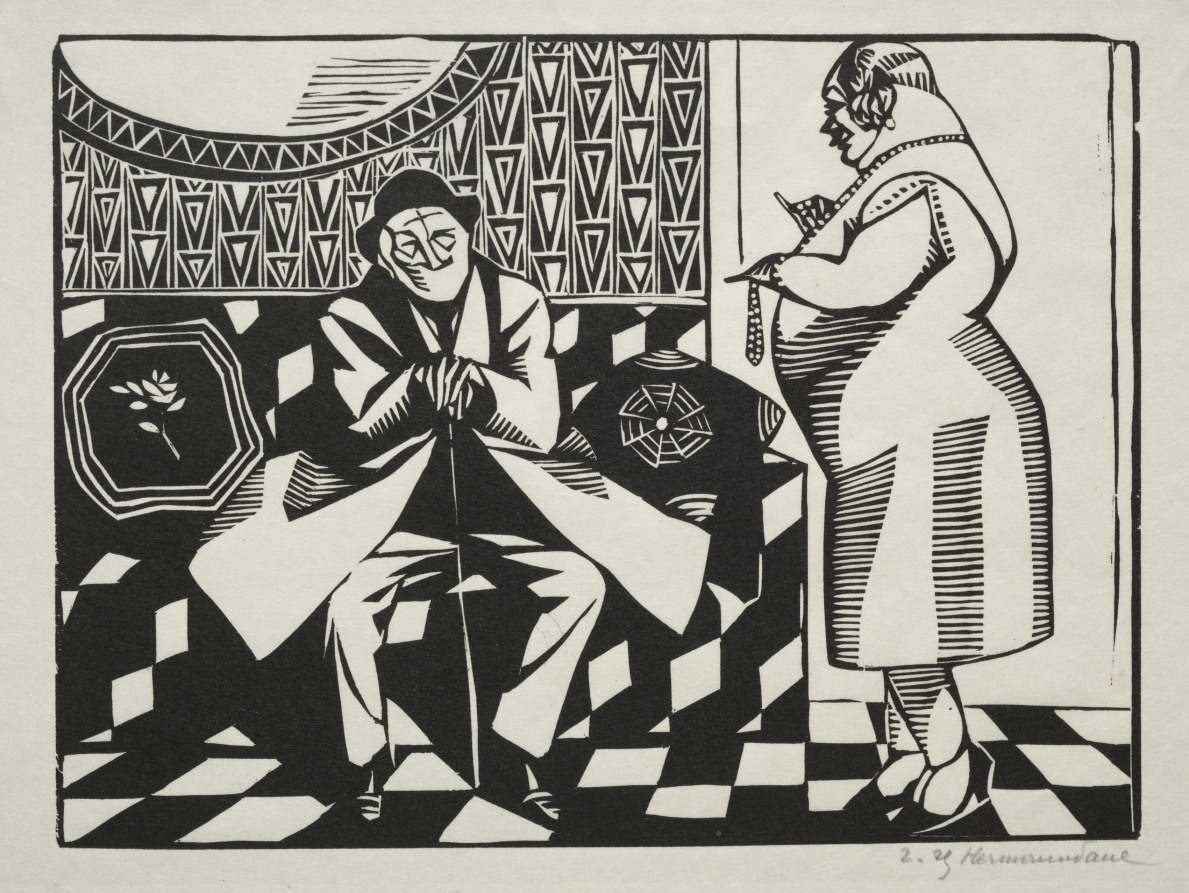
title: Non! pas de négresse, je suis pacifiste je voudrais une dame boche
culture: France, 20th century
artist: Hermann Paul (French, 1864–1940)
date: c. 1920s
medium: woodcut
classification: Print